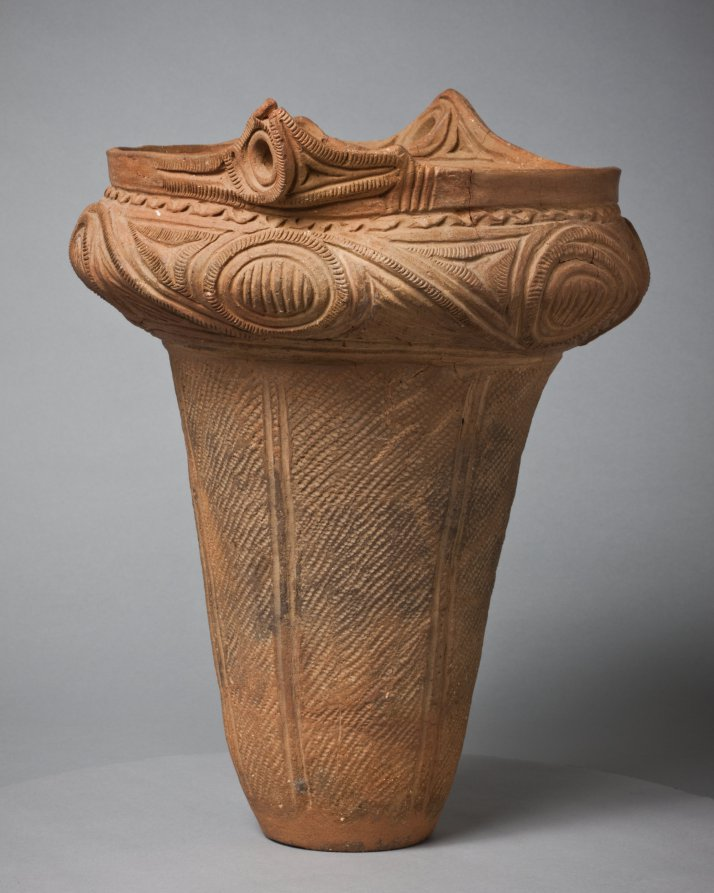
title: Urn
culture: Japan, Jōmon period (c. 10,500–300 BCE)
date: c. 2000 BCE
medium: earthenware, terracotta, impressed and incised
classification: Ceramic